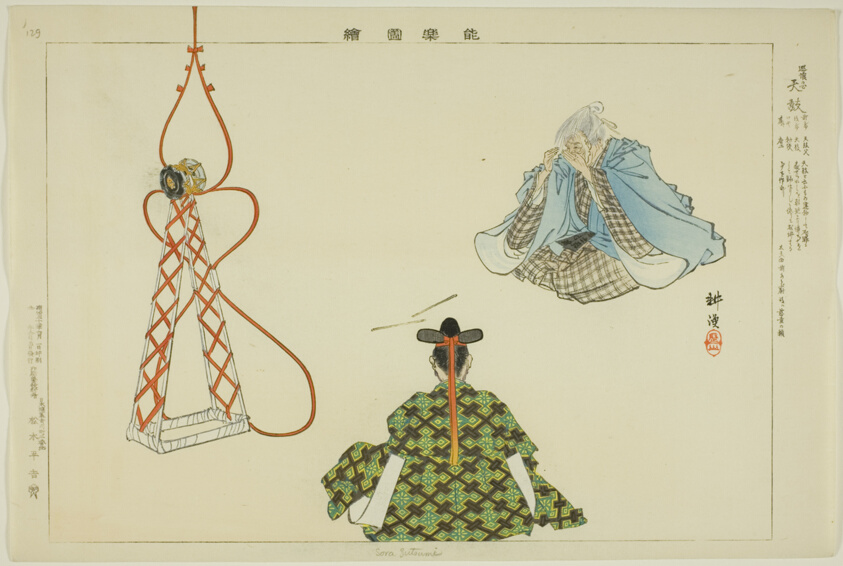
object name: Print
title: Sora Zutsumi, from the series "Pictures of No Performances (Nogaku Zue)"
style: Japanese (culture or style)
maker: Tsukioka Kogyo; Japanese, 1869-1927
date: 1898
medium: Color woodblock print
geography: Japan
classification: woodblock print; print; asian art